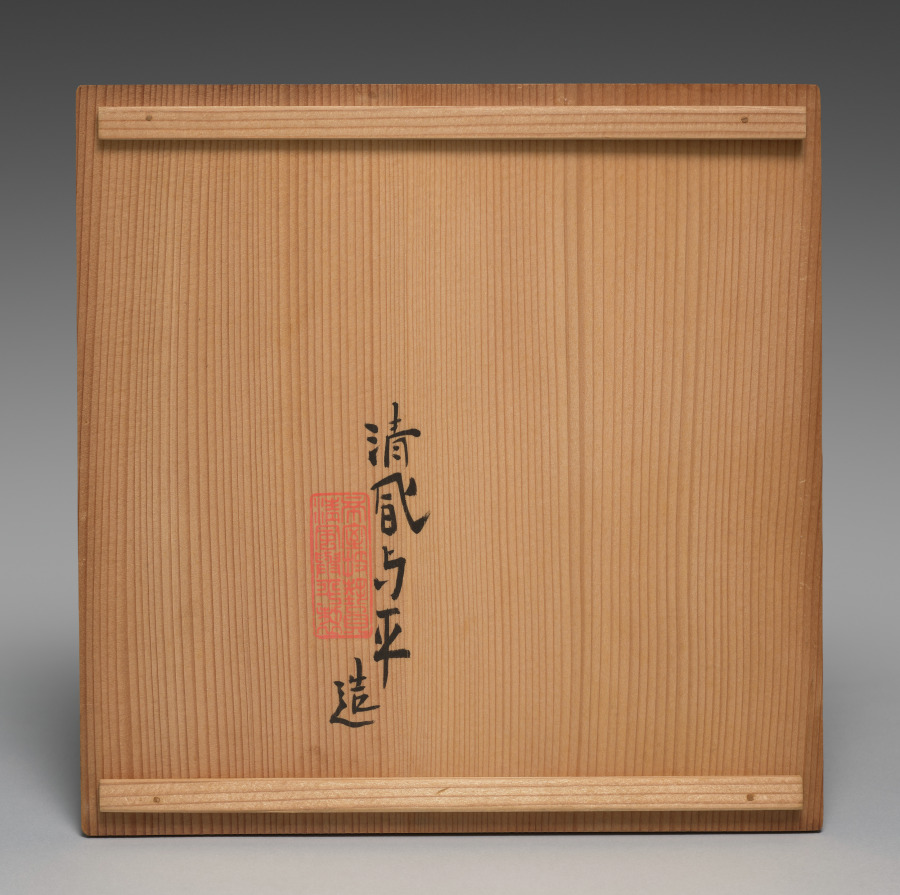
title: Lit Charcoal and Ash Containers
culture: Japan, Meiji period (1868–1912)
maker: Seifū Yohei III (Japanese, 1851–1914)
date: 1893–1914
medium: Set of four containers; porcelain with molded design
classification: Ceramic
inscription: 清風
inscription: The storage box for this set is inscribed and impressed with seals.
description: The box lid for these six-lobed lit charcoal and ash containers, or hiire, identifies them as kōhakuji, another of Yohei III’s translucent cream colors over ivory clay bodies. One might translate the name as “lustrous pearl[–glazed ivory] porcelain.” A hiire was filled with ash with burnt coals at the center so that embers and tobacco ash could be discarded safely during a gathering. Each of the lobes on the containers has a round protrusion set below the rim. The studlike pattern is called ruiza. The term is also used to describe the pattern that rings the shoulder of some flower vases or metal kettles used in chanoyu.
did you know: The Seifu studio generally followed the standard practice in Japan for identifying the artist and object in box inscriptions.